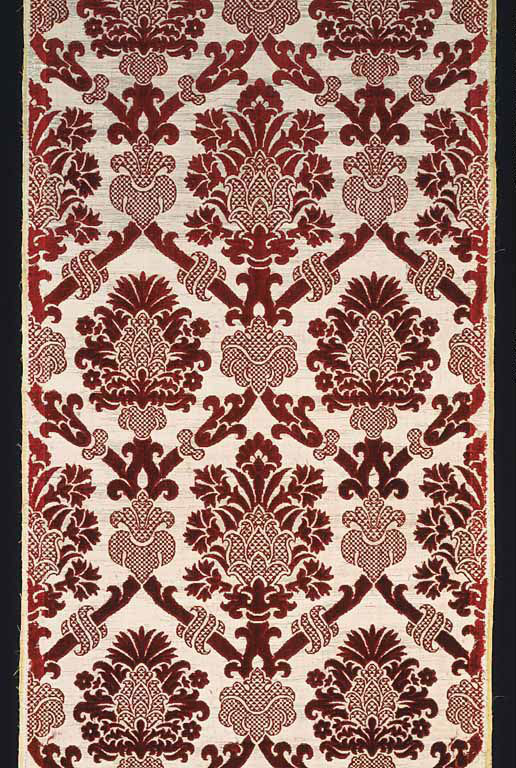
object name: Textile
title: Panel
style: Renaissance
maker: Italy or Spain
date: 1550/1600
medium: Silk, plain weave with silvered-metal strip supplementary facing wefts bound by secondary binding warps and supplementary pile warps forming cut and uncut voided "velvet"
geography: Italy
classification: textile; weaving - velvet